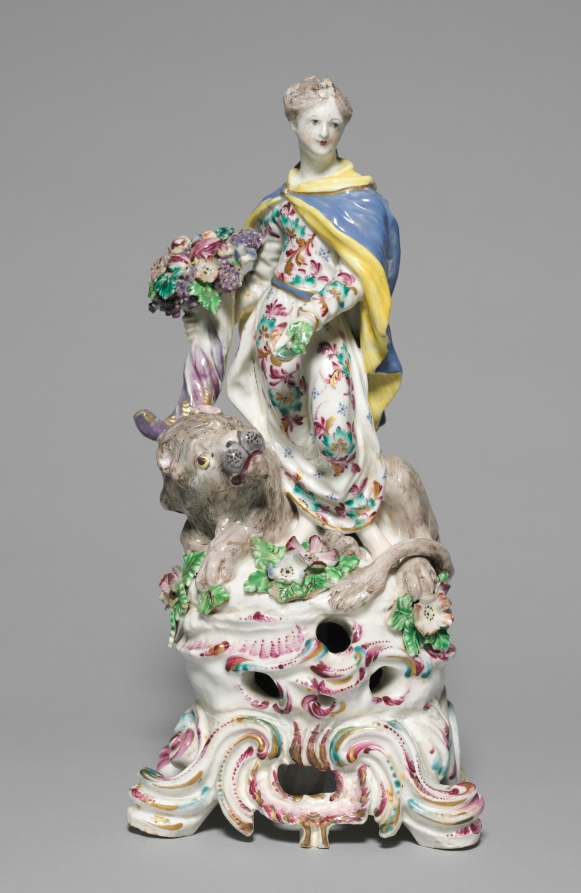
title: Figure of Earth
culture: England, 18th century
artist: Bow Porcelain Factory (British)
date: c. 1755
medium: porcelain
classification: Ceramic